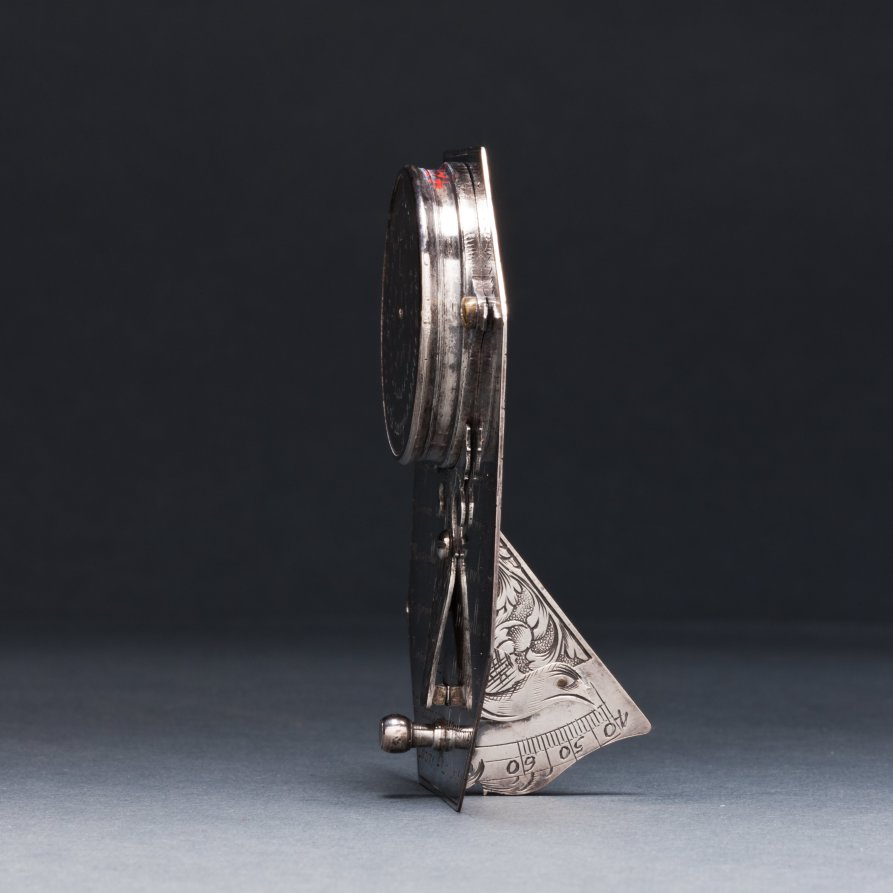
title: Butterfield Sundial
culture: France, 18th century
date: 1700s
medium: silver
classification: Silver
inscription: [Engraved signature above the compass in ribbon band]: "N. BION A Paris"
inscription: [Engraved on the face of the sundial]: “Pour 55° 4-5-6-7-8-9-10-11 50° IIII-V-VI-VII-VIII-IX-X-XI 45° 5-6-7-8-9-10-11 40° -VI-VII-VIII-IX-X-XI'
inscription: [Engraved on the other side]: "Pour 55° -8-7-6-5-4-3-2-1-0 50°-VIII-VII-VI-V-IIII-III-II-I 45°-8-7-6-5-4-3-2-1 40°-VII-VI-V-IIII-III-II-I"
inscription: [Engraved around the compass]: “NORD-OUEST-SUD-EST”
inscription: [Engraved on the back of the sundial]: “Turin 44 Milan 46 Paris 49 Lion 46 Metz 49 Rome 42 Liege 51 Naples 44 Namur 50 Gennes 44 Marseille 43 Grenoble 45 Bayonne 43 Bruxelle 51 Londres 52 Nantes 47 Vienne 48 Toulon 43 Tours 47 Lille 51”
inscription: [Engraved around the back of the compass]: “Venise 45 Strasbourg 49 Amsterdam 52 Hambourg 54 Varsovie 52 La Rochelle 46”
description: Butterfield-type sundials are characterized by their adjustable gnomons, metal flaps that cast a shadow on the dial’s face to indicate the hour, and geographical indices. This sundial has a scale adjustable between latitudes of 40° to 60° north. The latitudes of 26 European towns are engraved on its back for quick reference. With an intricately engraved silver face, it would have functioned as a fashionable traveler’s accessory.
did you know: Butterfield-style sundials were named after Micheal Butterfield, an English scientific and mathematical instrument maker who worked in Paris between 1674 and 1724.